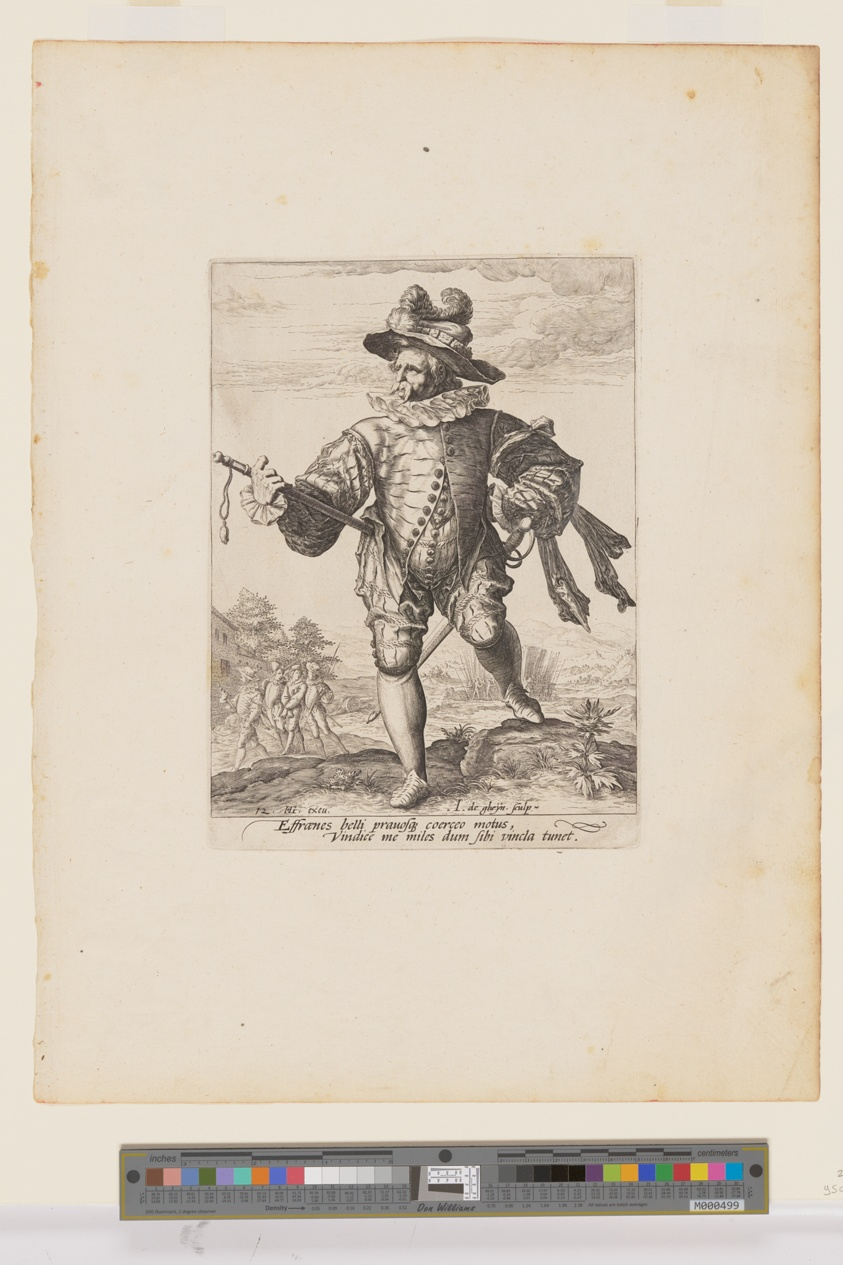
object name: Print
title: Provost, from Officers and Soldiers of the Bodyguard of Emperor Rudolph II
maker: Jacques de Gheyn II (Dutch, 1565–1629); after Hendrick Goltzius (Dutch, 1558–1617)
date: 1587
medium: Engraving on ivory laid paper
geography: Netherlands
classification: engraving; paper; print; prints and drawing